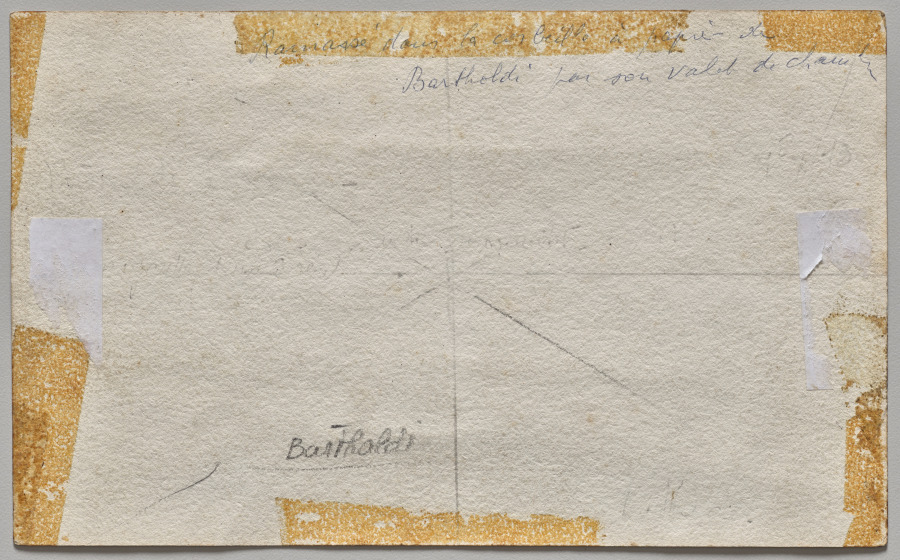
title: View of the Midwest Plains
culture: America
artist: Frédéric Auguste Bartholdi (French, 1834–1904)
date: c. 1871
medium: watercolor, graphite, ink wash, and gouache on paper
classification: Drawing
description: French artist Auguste Bartholdi is best known for designing the Statue of Liberty, a gfit from France to the United States in 1886, symbolic of freedom. He also maintained a watercolor practice throughout his career, and created a series of landscapes directly from nature while traveling across the United States in 1871 to identify a potential site for the Statue of Liberty. Here, Bartholdi depicts two figures riding horses before a landscape punctuated by distant buttes, suggesting the freedom he saw as characteristic of the United States.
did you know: During his trip across the United States, Bartholdi wrote that “This voyage will probably be a great influence on my entire career, and I am sure that great things will result from it.”